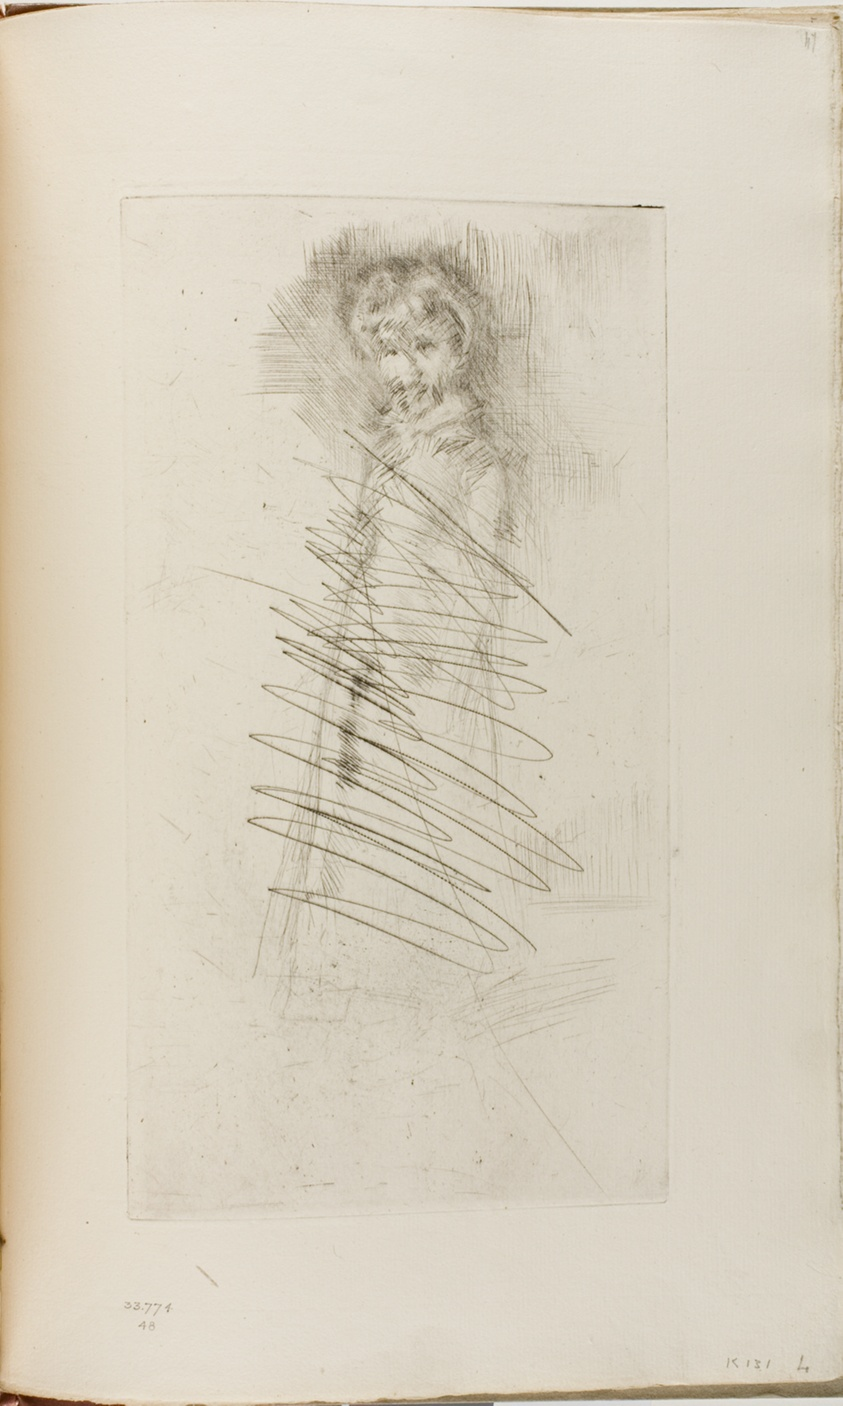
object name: Print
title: Girl Standing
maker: James McNeill Whistler (American, 1834-1903)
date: 1875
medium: Drypoint with foul biting, with drypoint cancellation, in black ink on ivory laid paper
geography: United States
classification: drypoint; prints and drawing; book; foul biting; print; paper